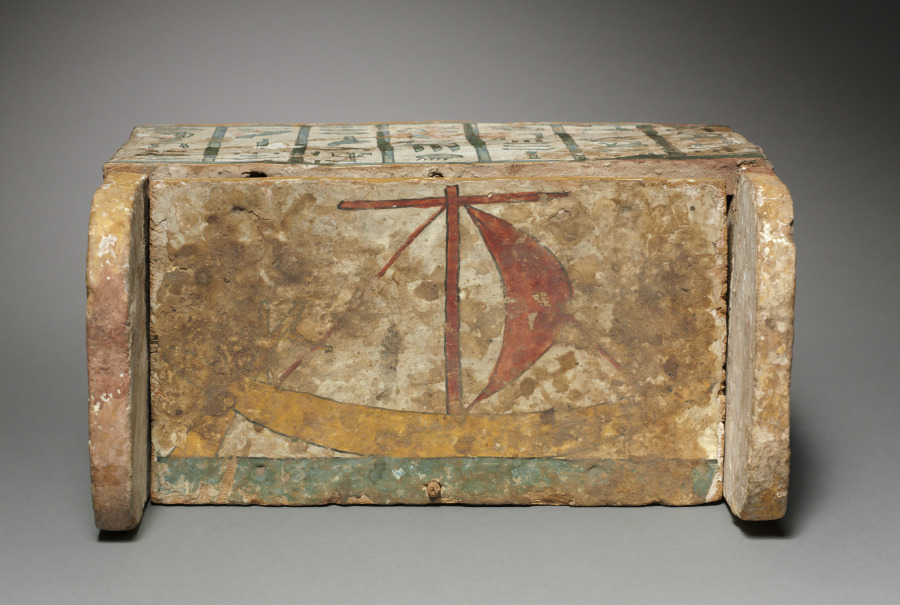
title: Shawabty Box of Ditamenpaankh (cover)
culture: Egypt, Late period (715–332 BCE), Dynasty 25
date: 715–656 BCE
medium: painted wood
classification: Funerary Equipment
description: High demand for shawabtys in the Late Period, a time when as many as 400 or more shawabtys were placed in the tomb with the deceased, gave rise to a specialized container for storing them: the shawabty box. This example is inscribed for the lady of the house, Ditamenpaankh, and was probably one of a pair originally made for her. The single-masted boat on the box’s lid is perhaps an allusion to the pilgrimage of the deceased to the holy city of Abydos, the cult city of Osiris, king of the dead. The shawabtys inside are crude, mass-produced examples cast in an open mold. Made of terracotta, their blue paint imitates more costly shawabtys made of faience. As for the shawabty spell, it has been removed from its traditional location on the shawabty’s front and relocated onto the sides of box, where it needed only to be written once, thus expediting production.